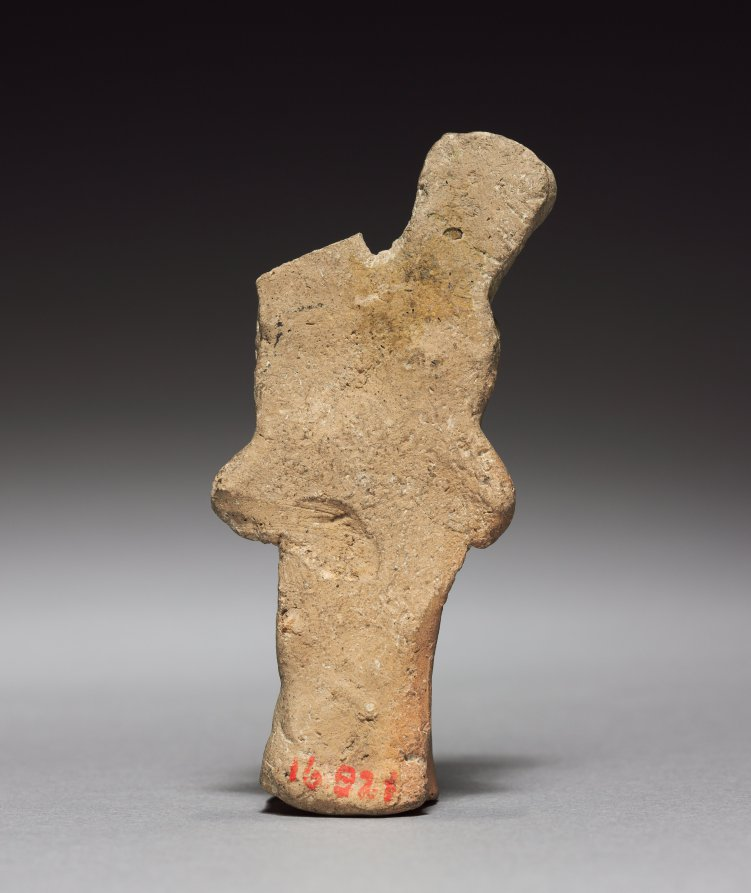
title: Figurine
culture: Mexico, Aztec, 14th century-16th century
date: 1325–1521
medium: terracotta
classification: Ceramic